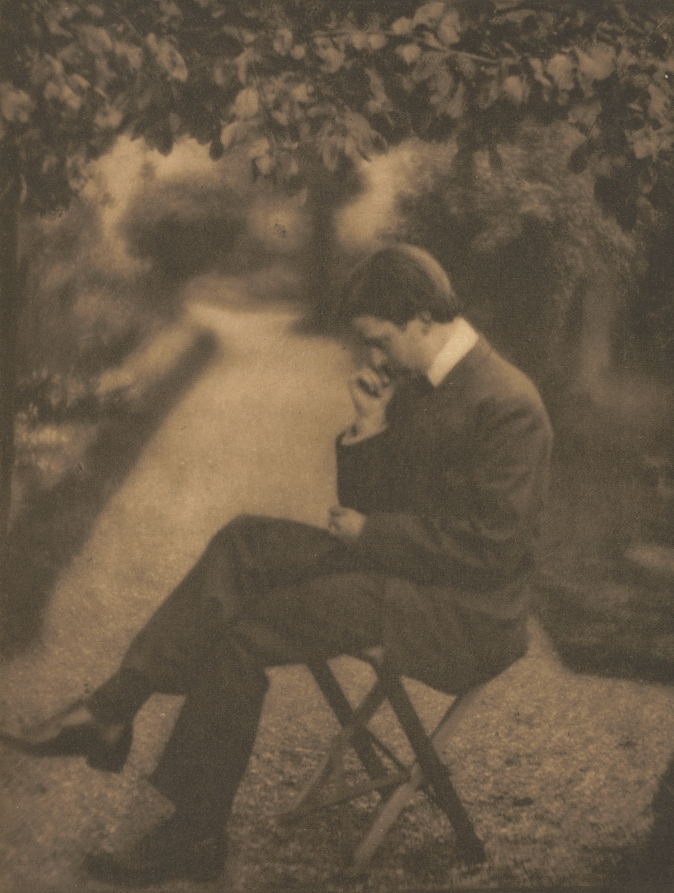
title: Camera Work: Portrait of Alvin Langdon Coburn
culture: England, 20th century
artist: George Bernard Shaw (British, 1856–1950)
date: 1906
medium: photogravure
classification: Bound Volume